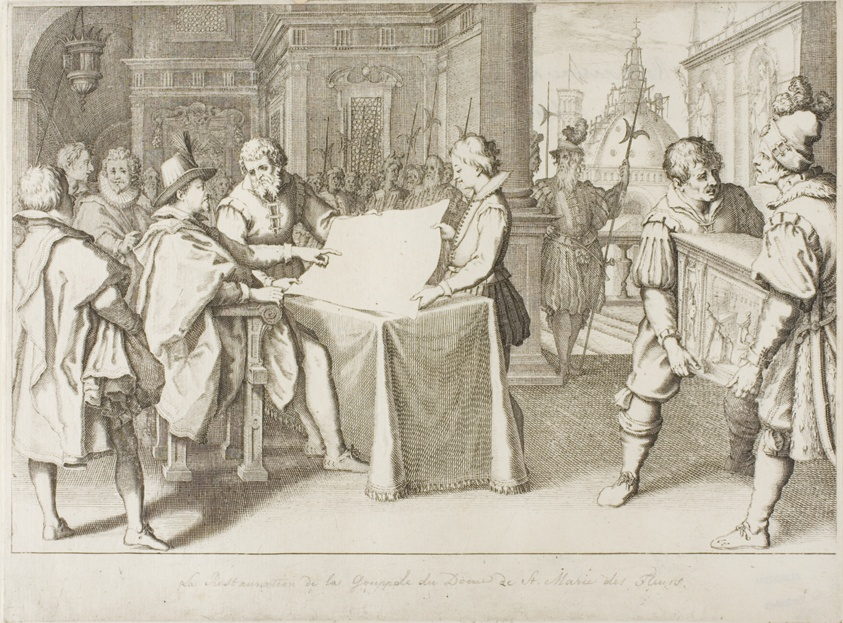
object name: Print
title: The Restoration of the Dome of Florence, from The Life of Ferdinand de' Medici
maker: Jacques Callot (French, 1592-1635)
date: 1614/20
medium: Engraving on ivory laid paper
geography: France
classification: engraving; print; prints and drawing